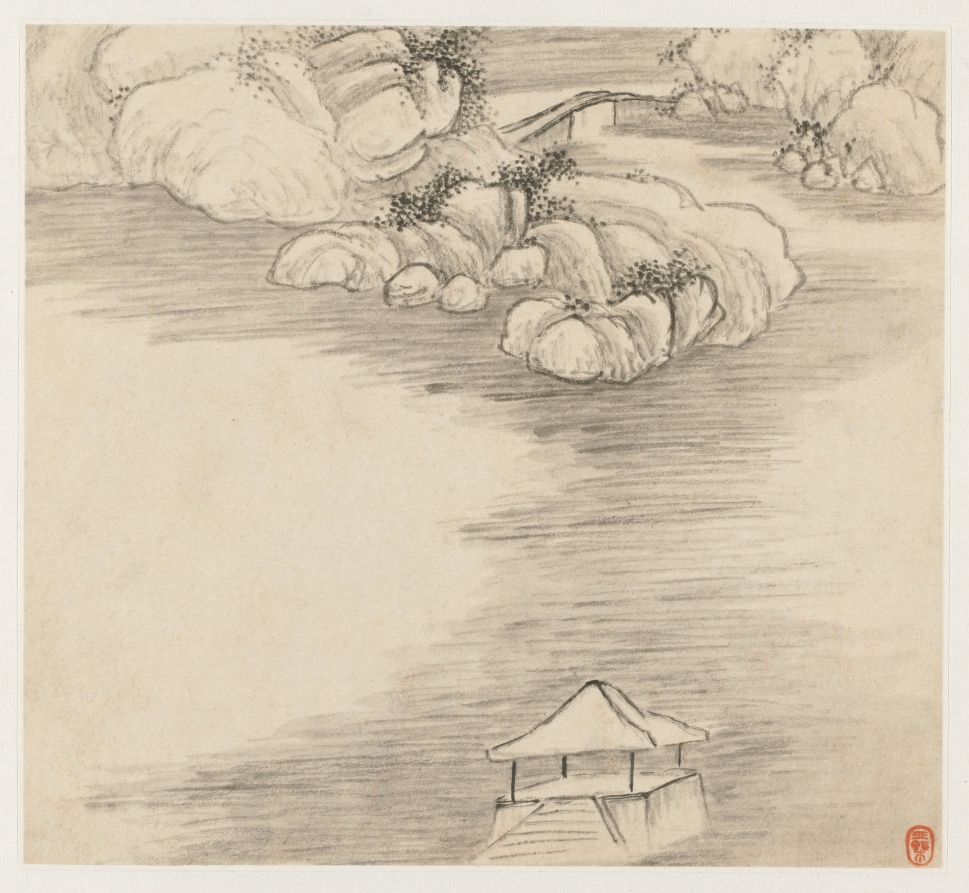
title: Album of Landscapes: Leaf 3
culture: China, Qing dynasty (1644-1911)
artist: Wang Gai (Chinese, active c. 1677–1705)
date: 1677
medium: album leaf, ink and light color on paper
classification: Painting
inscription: Poem by Li Lai-t'ai